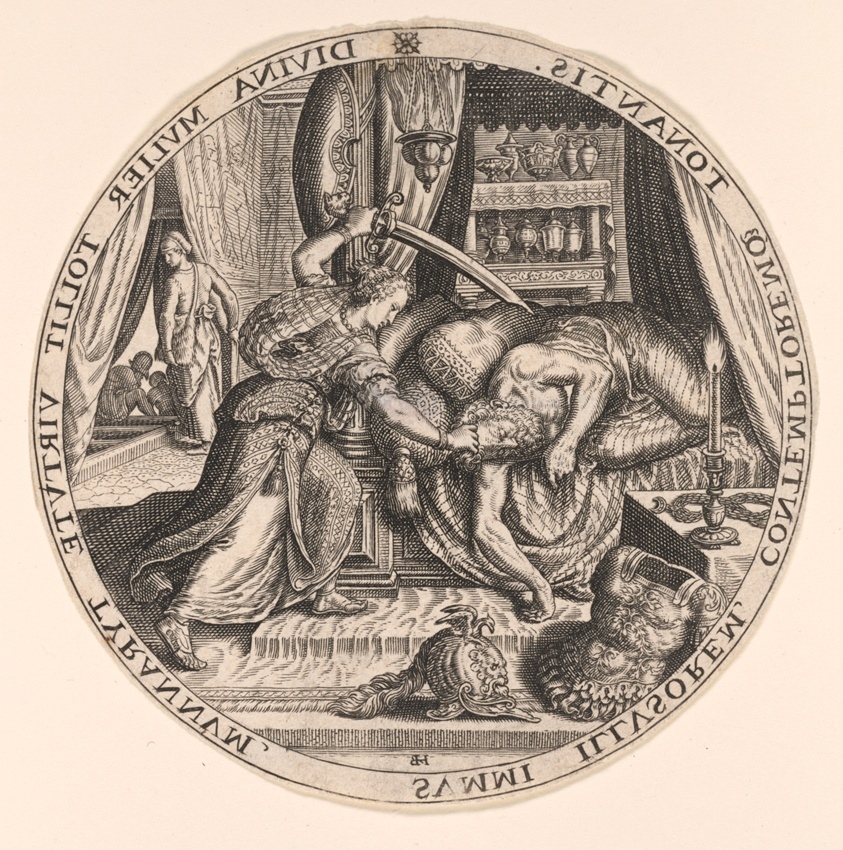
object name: Print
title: Judith and Holofernes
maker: Johann Theodor de Bry (Franco-Flemish, 1561–1623); after Maerten van Heemskerck (Netherlandish, 1498-1574)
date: 1580/1600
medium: Engraving on paper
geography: France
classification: engraving; paper; print; prints and drawing